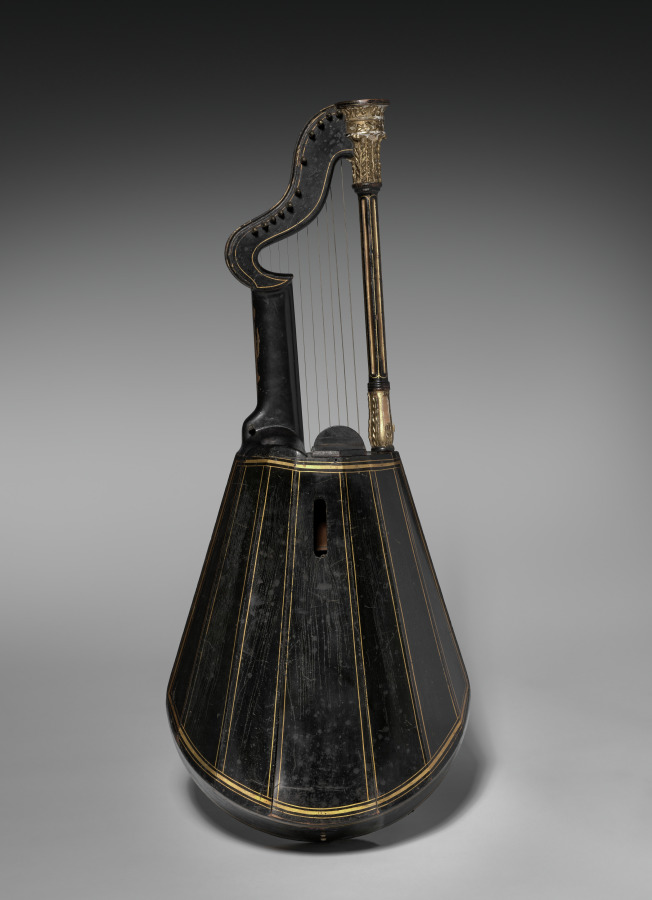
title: Harp-Lute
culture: England, London, 18th century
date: 1700s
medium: varnished wood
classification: Musical Instrument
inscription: the maker's name is illegible, but the number of the instrument is 14.